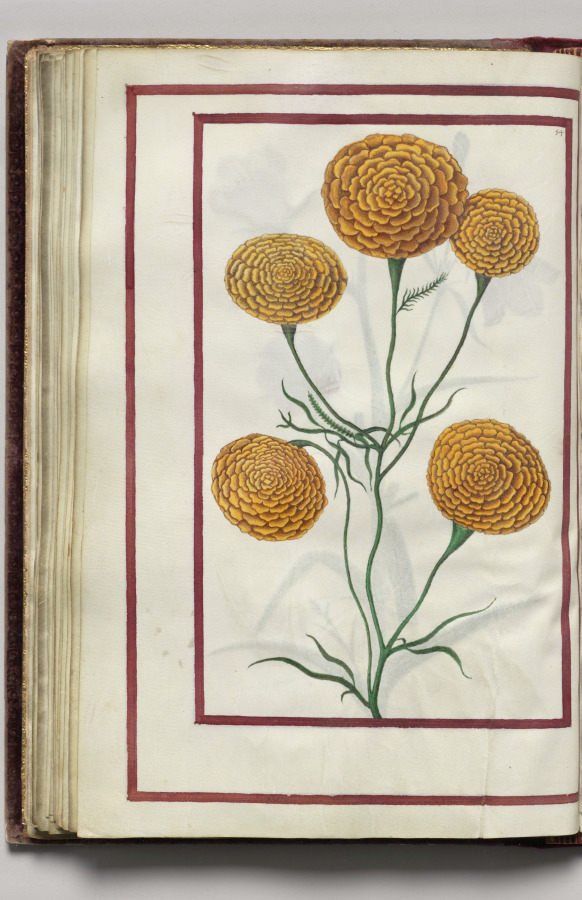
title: Campanula, folio 27 (verso), from Florilegium (A Book of Flower Studies)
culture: France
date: 1608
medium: watercolor, ink, silver, and gold over occasional traces of pencil, on vellum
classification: Bound Volume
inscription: Dated: Poitiers 1608 (on frontispiece) Signed: On frontispiece in black ink, lower right: Van Kuyk Notation on drawing: Frontispiece: in pencil, lower margin: * élève de Van Kessel, peintre flammand (* in pencil also appears in front of Van Kuyk's name).